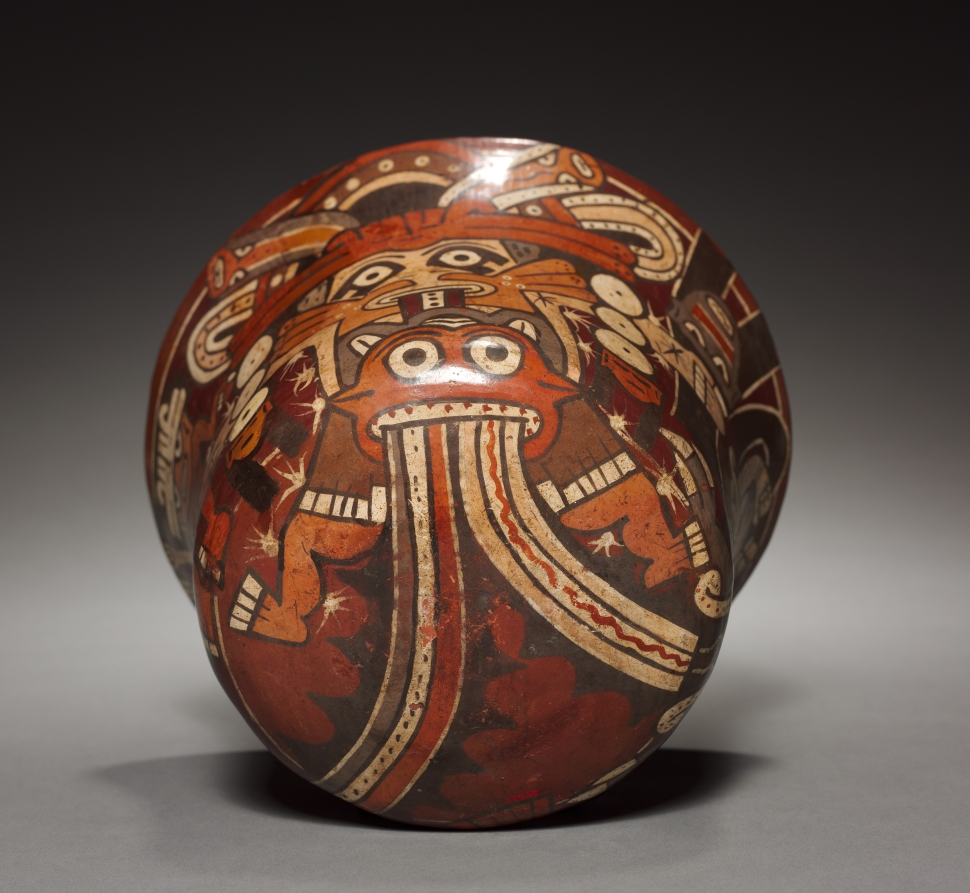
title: Bowl with Costumed Being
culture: Peru, South Coast, Nasca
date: 100 BCE–700 CE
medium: earthenware with colored slips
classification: Ceramic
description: Supernatural figures like the one on this bowl are shown wearing ornaments that actually exist-like the nearby Mouth Mask-they may represent humans clothed as deities who served as living cult images during rituals. The figure holds a severed head that probably alludes to capture of an enemy’s life force, since severed heads and fertility are linked in Nasca art.